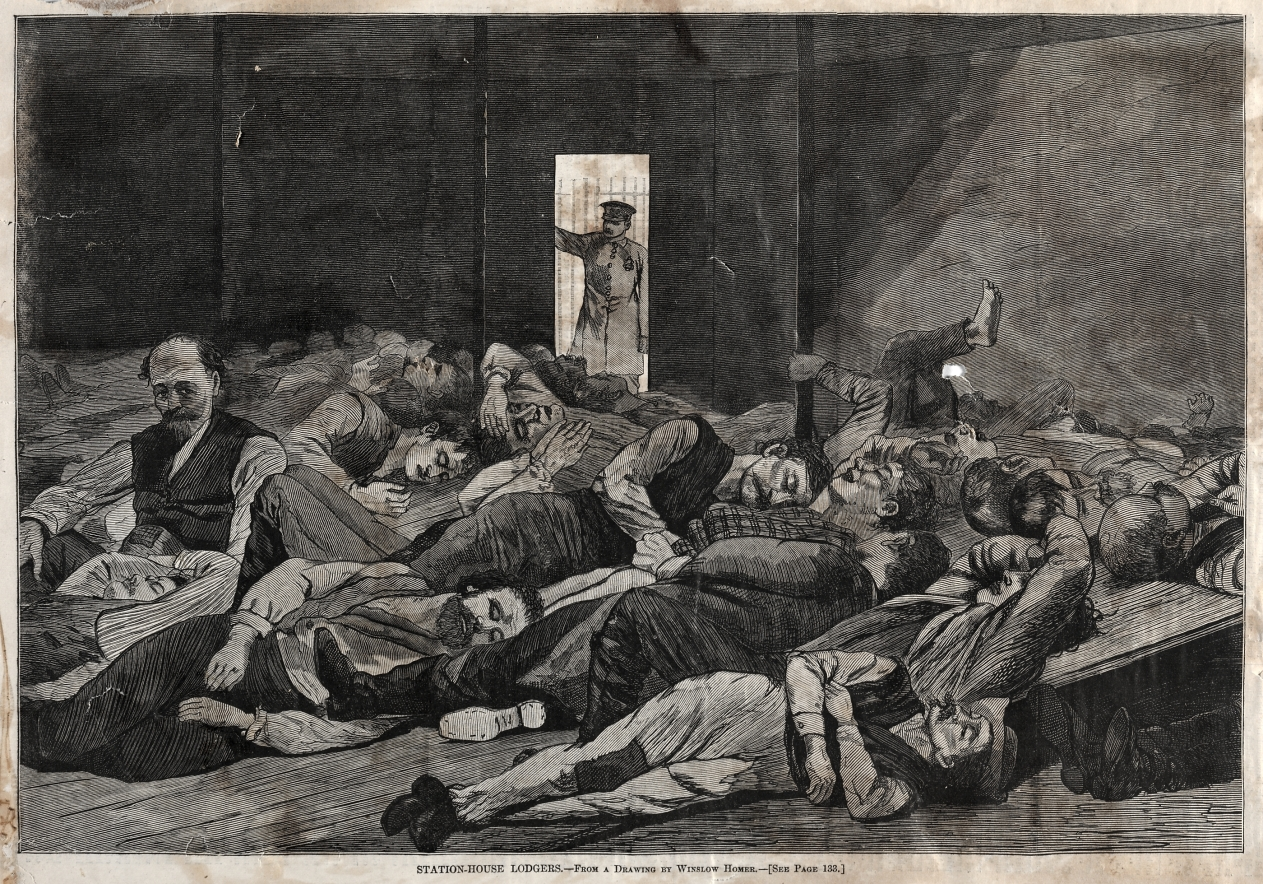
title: Station-House Lodgers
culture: America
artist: Winslow Homer (American, 1836–1910)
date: 1874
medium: wood engraving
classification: Print